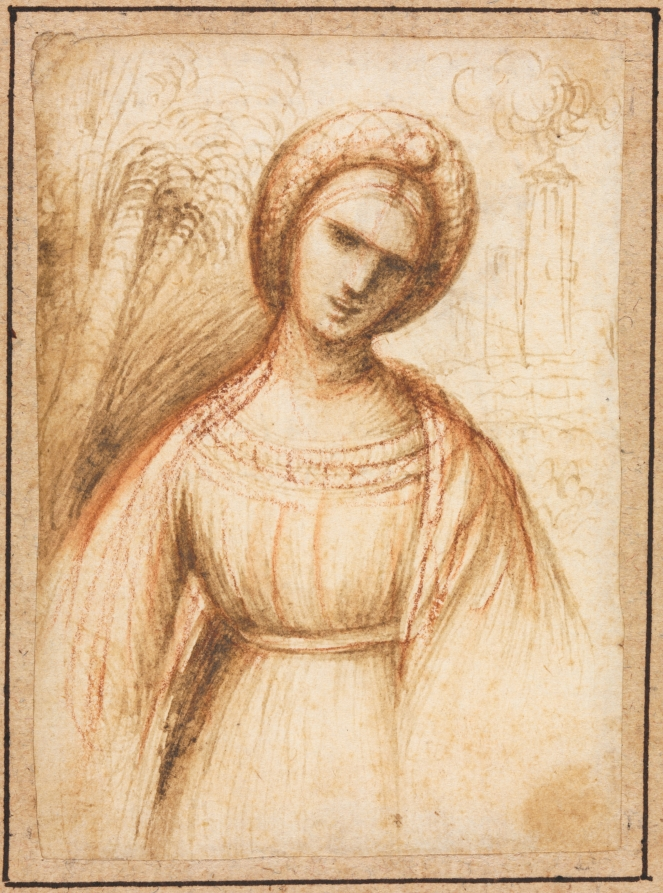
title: Lady in a Landscape (recto)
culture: Italy, Ferrarese, 16th century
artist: possibly by Dosso Dossi (Italian, c. 1490–after 1541)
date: c. 1521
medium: brush and brown wash and red chalk (extended with brush and water in places)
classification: Drawing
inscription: SECONDARY SUPPORT, lower center, in graphite: F[ran?] Francia